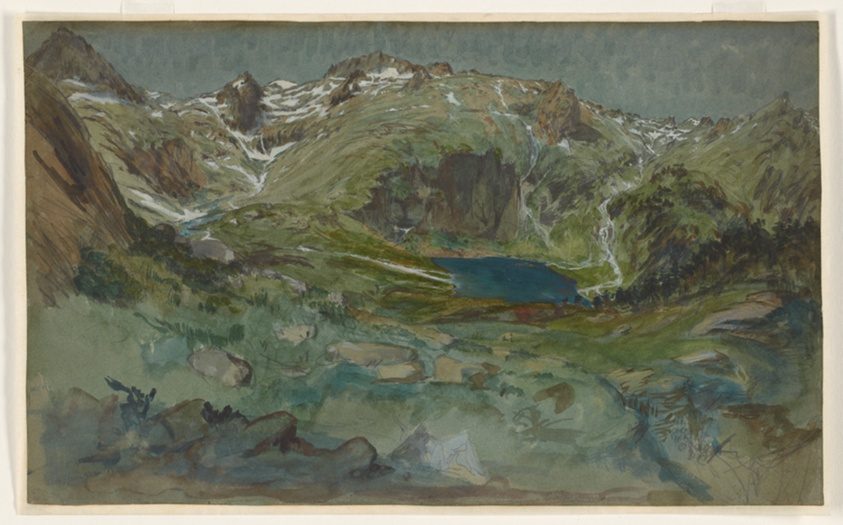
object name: Drawing and Watercolor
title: View of the Lac d’Espingo and the Cirque d’Espingo in the Pyrenees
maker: Eugène-Emmanuel Viollet-le-Duc (French, 1814–1879)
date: Aug. 21, 1865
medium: Watercolor and opaque watercolor, over graphite, on blue-gray wove paper, laid down on Japanese paper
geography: France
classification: drawings (visual works); watercolor; paper; prints and drawing